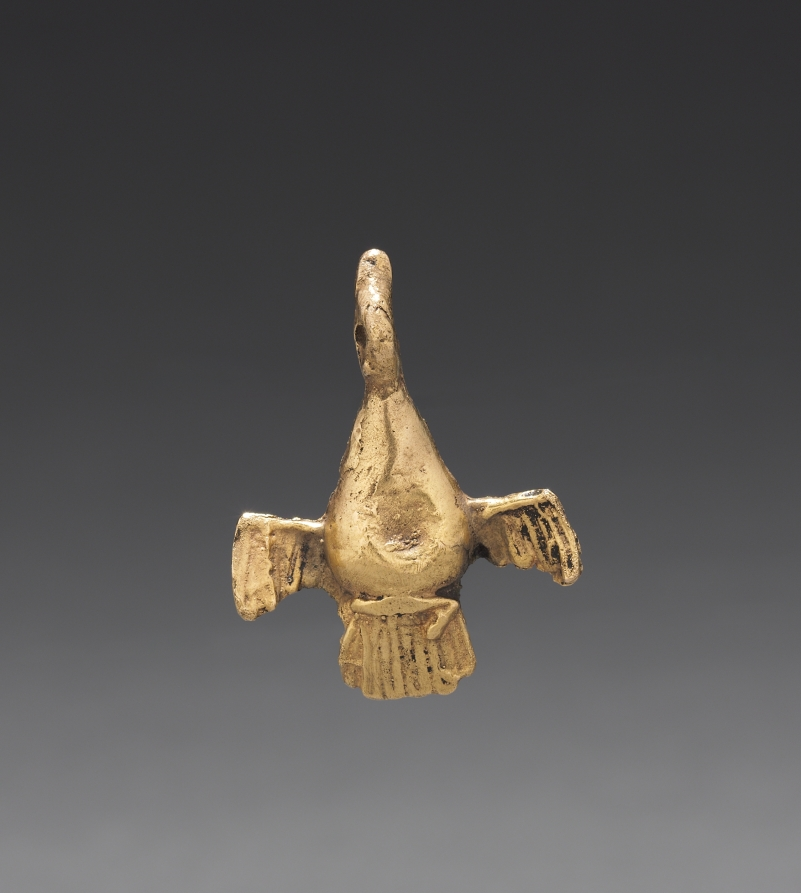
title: Bird Pendant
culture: Mexico, Oaxaca, Ejutla(?), Mixtec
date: 1350–1519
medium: cast gold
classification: Sculpture